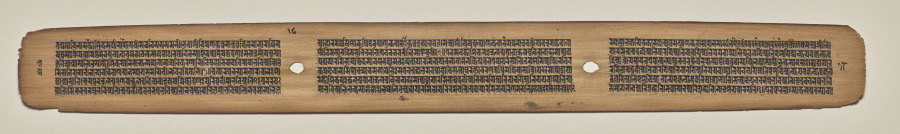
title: Text, Folio 18 (verso), from a Manuscript of the Perfection of Wisdom in Eight Thousand Lines (Ashtasahasrika Prajnaparamita-sutra)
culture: Eastern India, Bihar, Vikramashila Monastery. Painting: Nepal, Kathmandu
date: Sunday, September 14, 1119 (year 239 of the Newar Samvat in the month of Ashvina)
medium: gum tempera and ink on palm leaves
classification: Painting